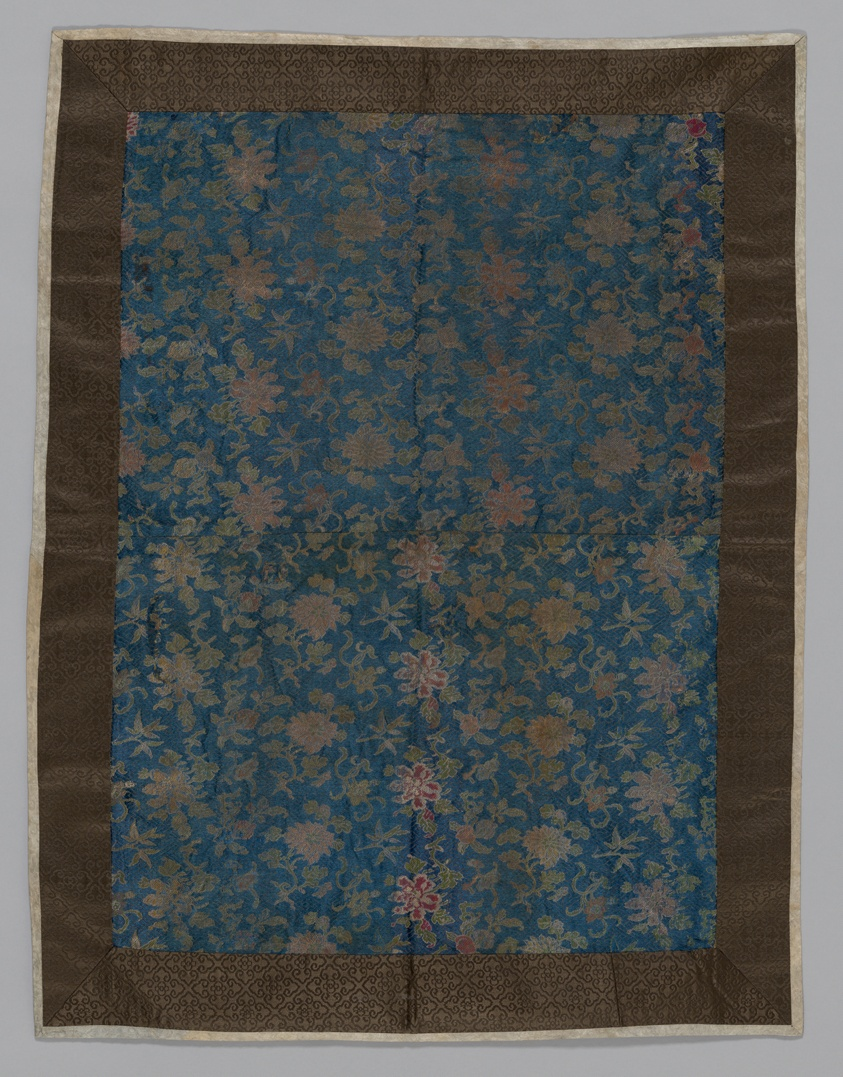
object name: Textile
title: Panel (Furnishing Fabric)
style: qing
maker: China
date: Qing dynasty (1644–1911), 1875/1900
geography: China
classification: textile; weaving; furnishing textile